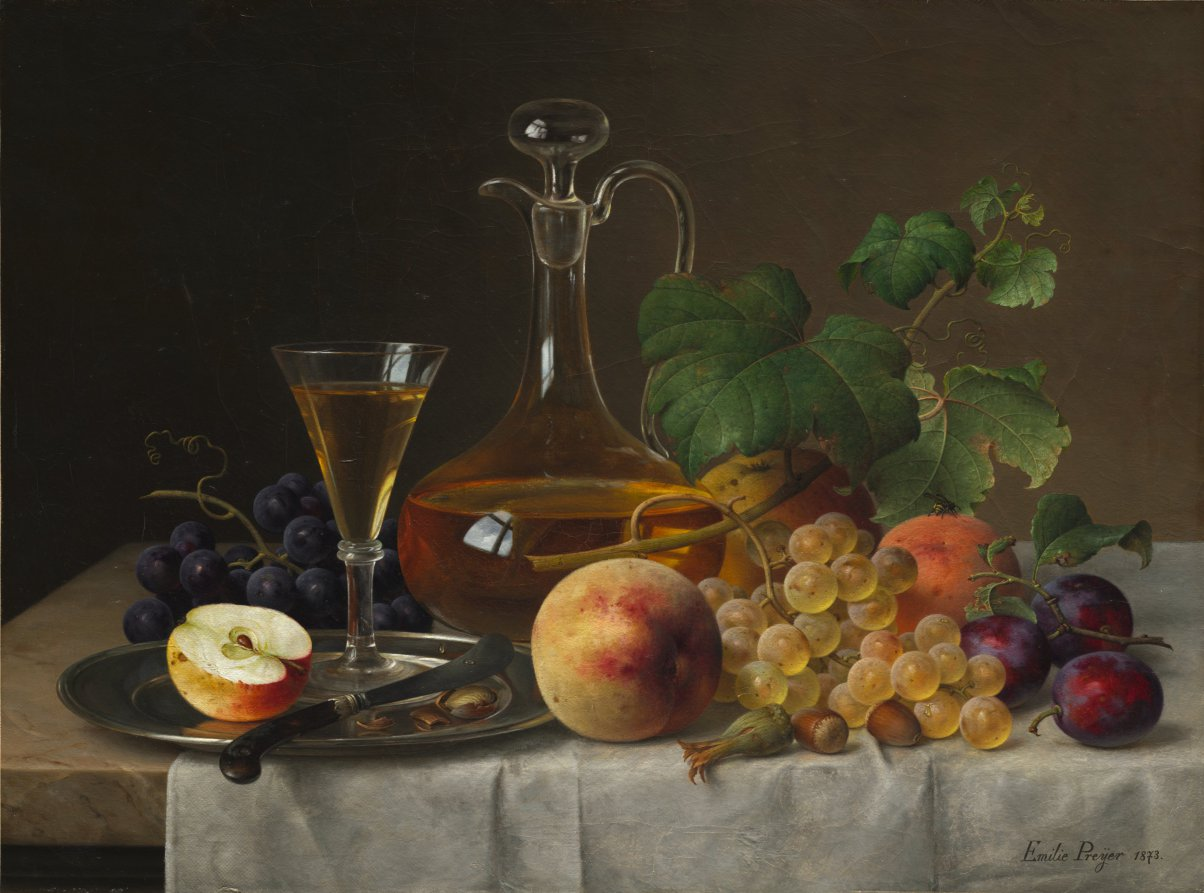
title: Still Life with Fruit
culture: Germany, 19th century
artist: Emilie Preyer (German, 1849–1930)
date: 1873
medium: oil on fabric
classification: Painting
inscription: Signed lower right corner: Emilie Preijer 1873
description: This composition contains many elements that show Preyer's technical abilities. She convincingly rendered the various textures juxtaposed in this composition, such as the contrast between the white cloth and the polished marble table, and the reflecting surfaces of metal, water drops, and glass versus the delicate skin of peaches and grapes. The knife that appears to project out over the side of the table is an indicator of Preyer's familiarity with the tradition of Dutch still-life painting. After early training with her father, Johann Wilhelm Preyer (1803-1889), Emilie Preyer painted her first still life in 1867. For study purposes, she visited museums in Dresden, Antwerp, and the Netherlands. She focused primarily on still lifes of fruit.